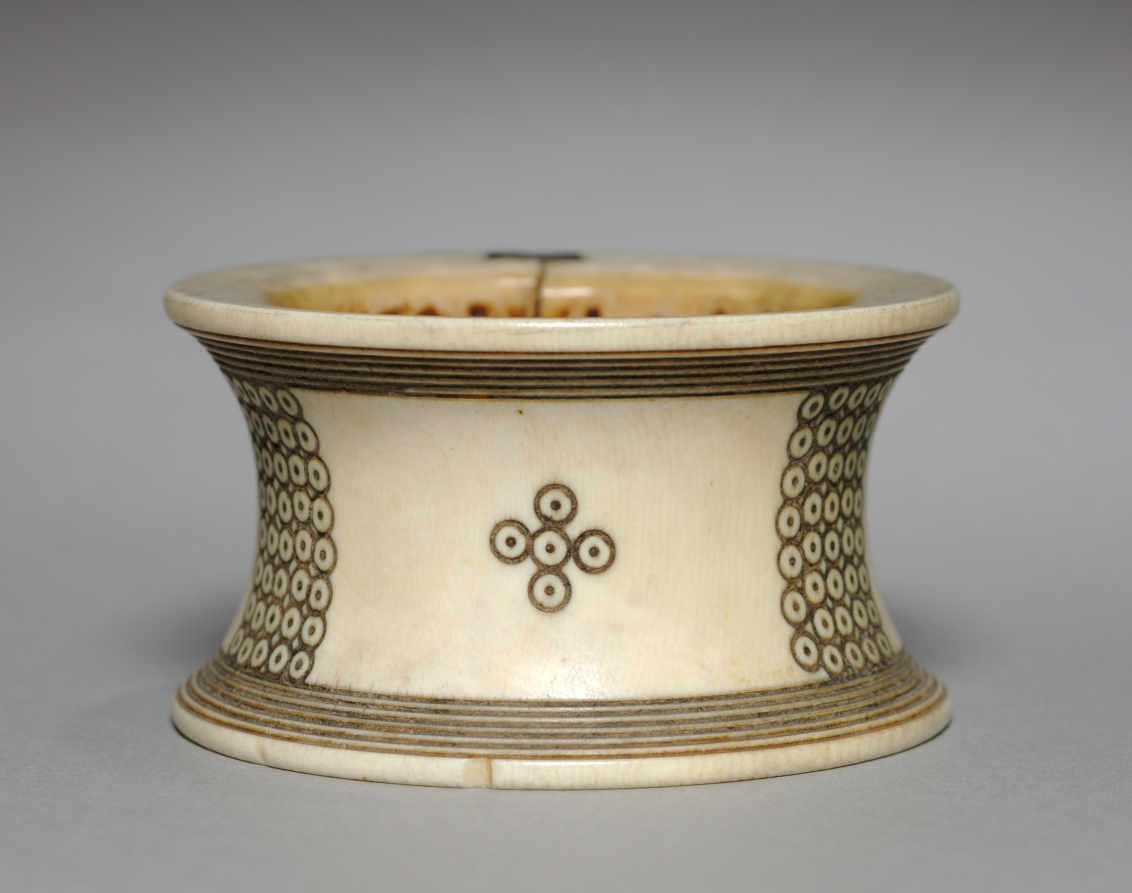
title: Bracelet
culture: Africa, Central Africa, Democratic Republic of the Congo, Kuba-style maker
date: c. 1900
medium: Ivory and wire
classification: Jewelry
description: This ivory bracelet is simple, yet elegant. Note how the delicate wire repair by a Kuba artisan adds a counterpoint pattern to the original design.